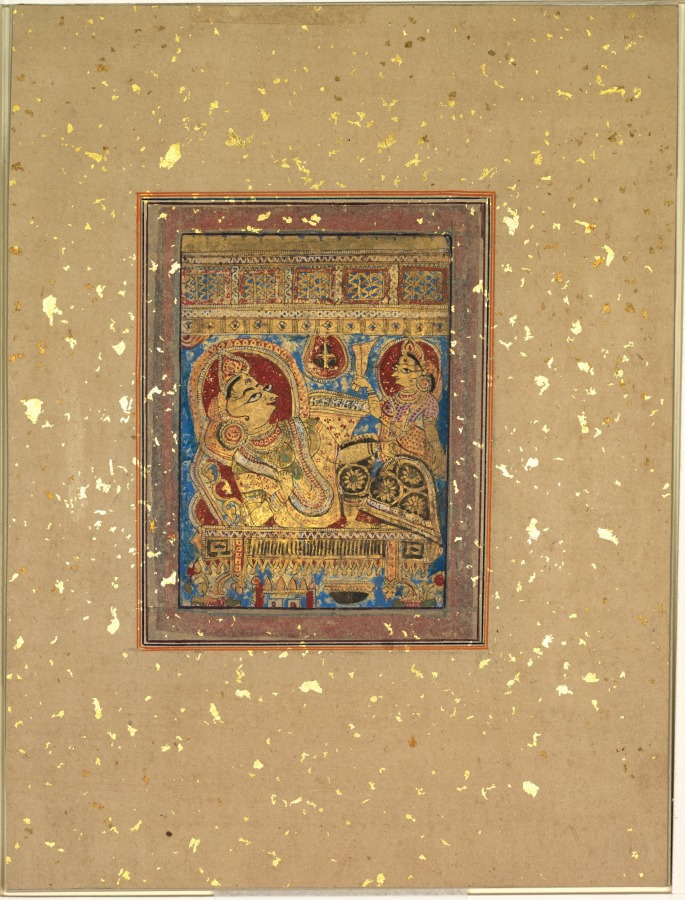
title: Painting from a Kalpa-sutra: Queen Trishala Reclining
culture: Western India, Gujarat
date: c. 1450–75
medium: Gum tempera and gold on paper; 18th century gold flecked border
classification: Painting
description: Until recently, and especially during the 1800s and early 1900s, the paintings in South Asian manuscripts were excised and mounted as individual works of art. These two paintings from a Jain manuscript of the Kalpa-sutra have been separated from the text and mounted with gold-flecked borders, like pictures in an album.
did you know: Queen Trishala is enjoying a happy pregnancy with the Jina-to-be.